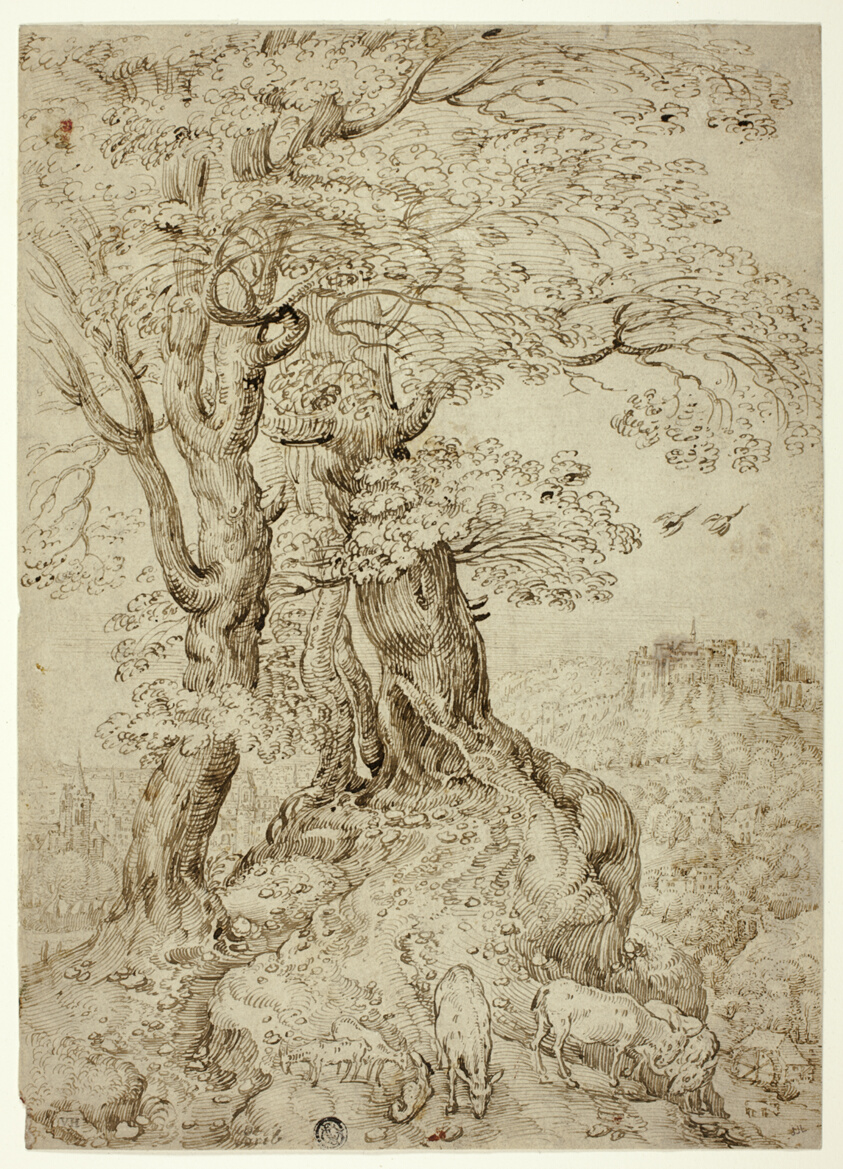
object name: Drawing and Watercolor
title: Wooded Landscape with Donkeys and Goats, and Castle on Hill in Distance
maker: After Pieter Bruegel, the elder; Flemish, 1525/30-1569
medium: Pen and brown ink on cream laid paper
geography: Flanders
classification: pen and ink drawings; drawings (visual works); prints and drawing